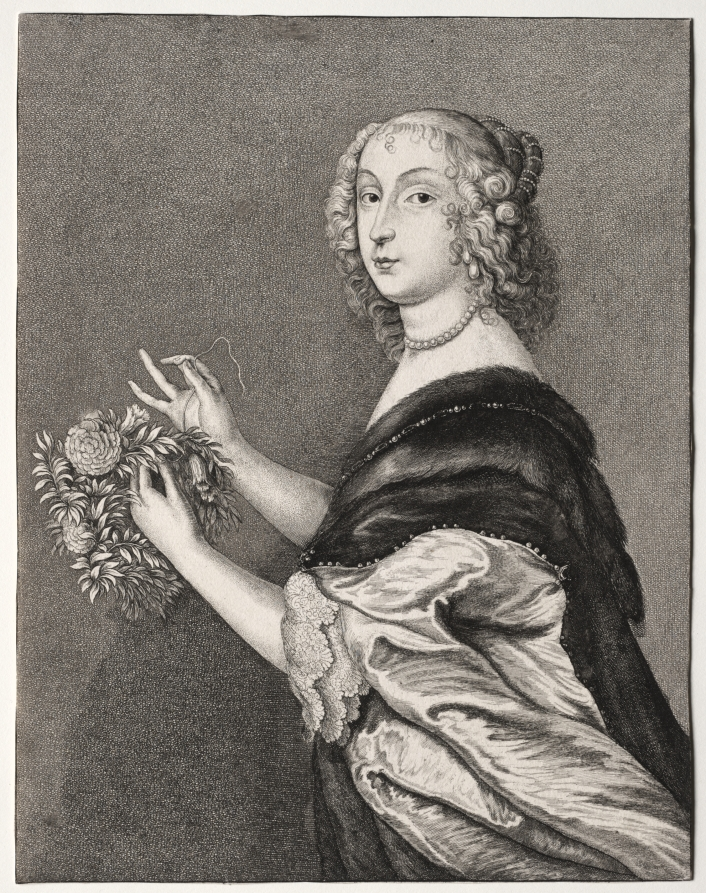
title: Cecilia, Lady Killigrew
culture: England, 18th century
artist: Robert Gaywood (British, 1650–1711)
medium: etching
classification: Print